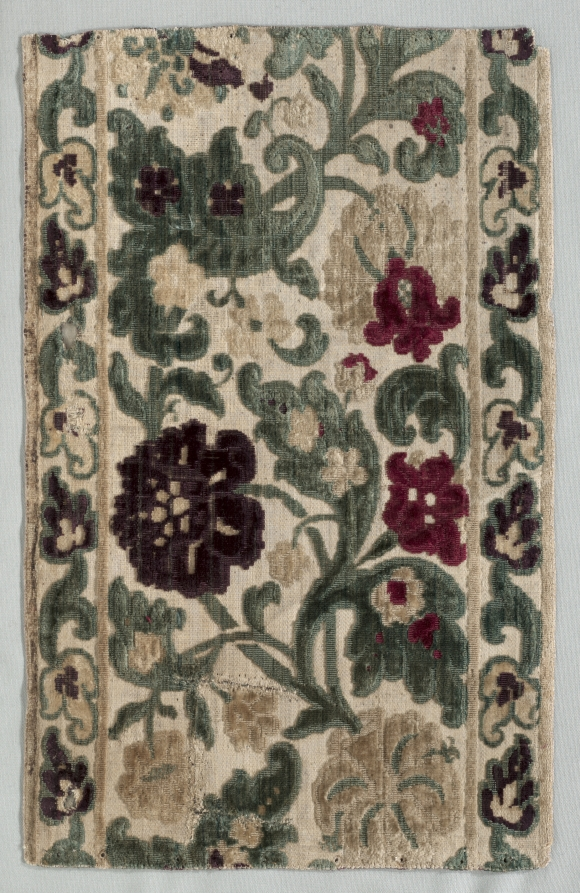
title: Velvet Fragment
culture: Italy, late 17th - early 18th century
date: late 1600s - early 1700s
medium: velvet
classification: Velvet